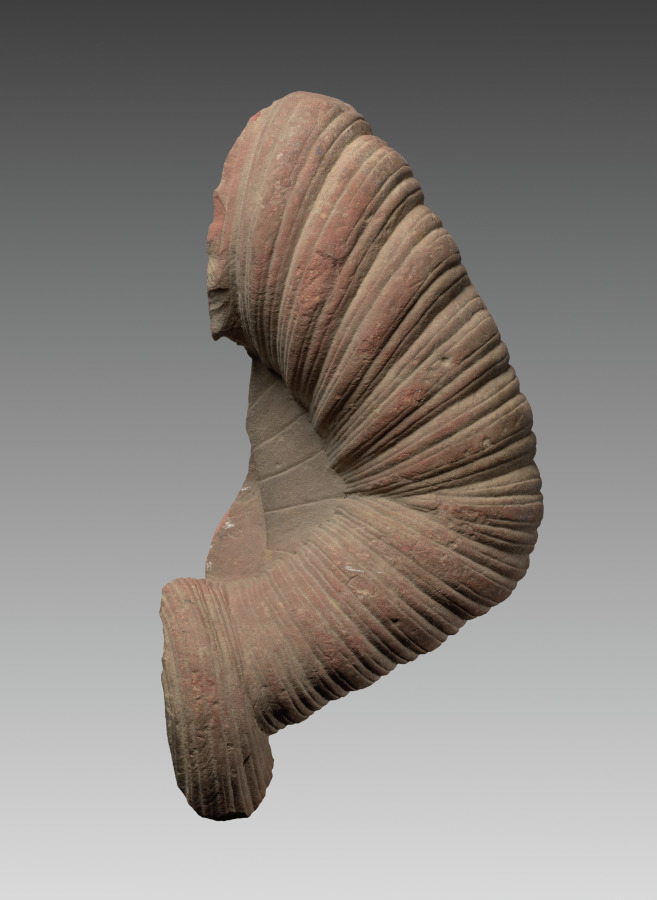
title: Arm of Buddha or Bodhisattva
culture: India, Mathura, Kushan period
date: c. 75–100 CE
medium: stone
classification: Sculpture